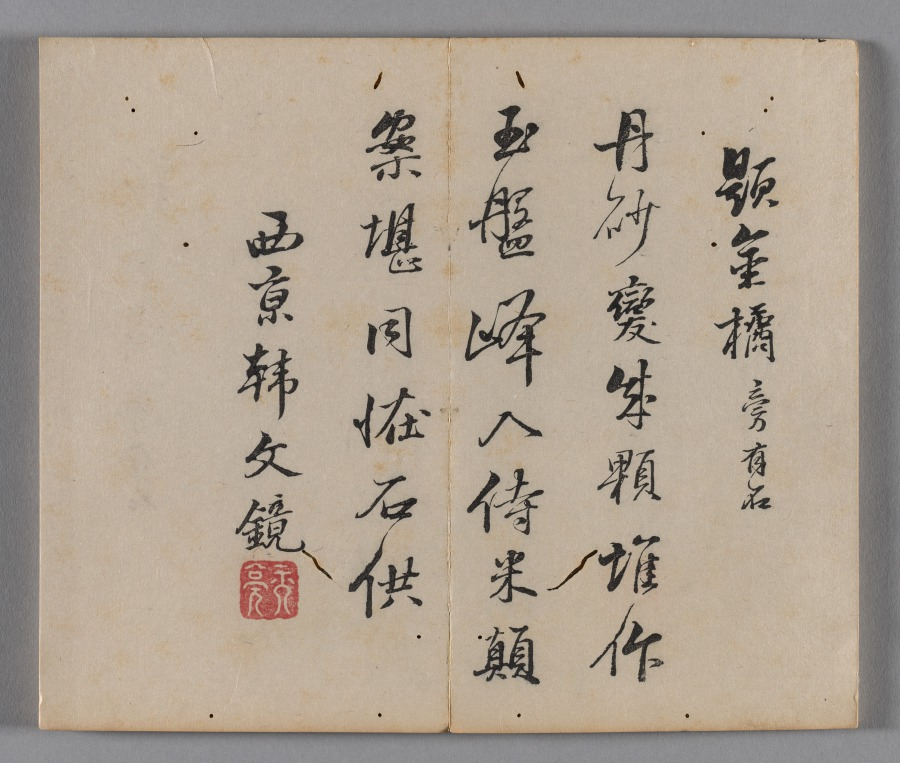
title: Ten Bamboo Studio Painting and Calligraphy Handbook (Shizhuzhai shuhua pu): Fruit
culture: China, Qing dynasty (1644-1911)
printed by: Hu Zhengyan (Chinese, c. 1584–1674)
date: 1633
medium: Woodblock-printed book; ink and colors on paper; first edition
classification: Print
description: Color printing reached a level of perfection in the early 1600s, as seen in this Ten Bamboo Studio Collection of Calligraphy and Painting and the Mustard Seed Garden Manual of Painting (printed 1679 and 1701). The painterly quality, precision in registering (aligning) the woodblocks, and harmonious colors made them the most successful color print editions in Chinese history. Both editions were printed and compiled in Nanjing, spread nationwide, and had a great impact on the arts in Japan and Korea.